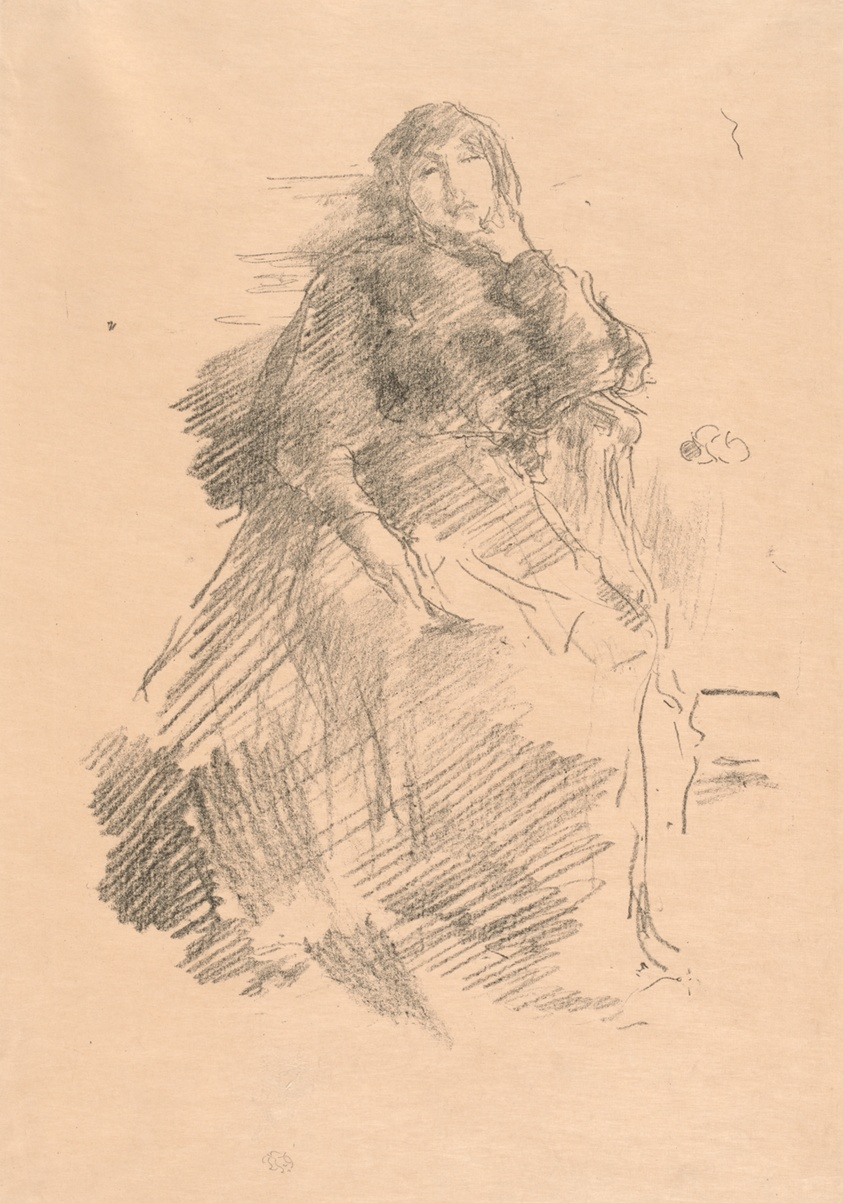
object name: Print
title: La Belle Dame paresseuse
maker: James McNeill Whistler (American, 1834-1903)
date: 1894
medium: Lithograph from thin transparent transfer paper, in black ink, on cream wove Japanese vellum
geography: United States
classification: lithograph; paper; print; prints and drawing